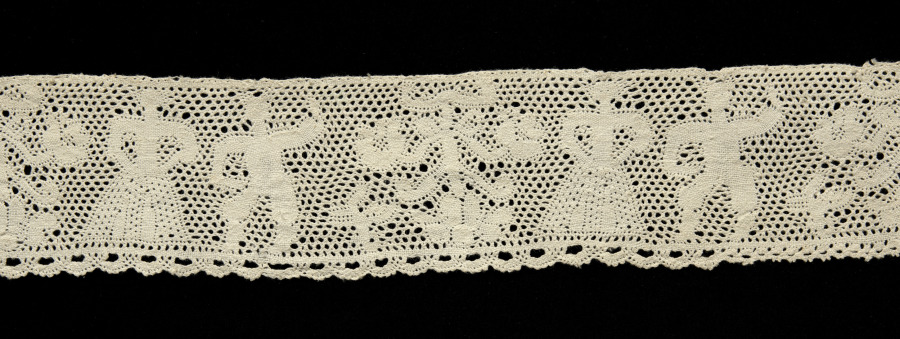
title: Lace Edging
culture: Italy, Abruzzi, Pescocostanzo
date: 1600s–1700s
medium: Bobbin lace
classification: Lace